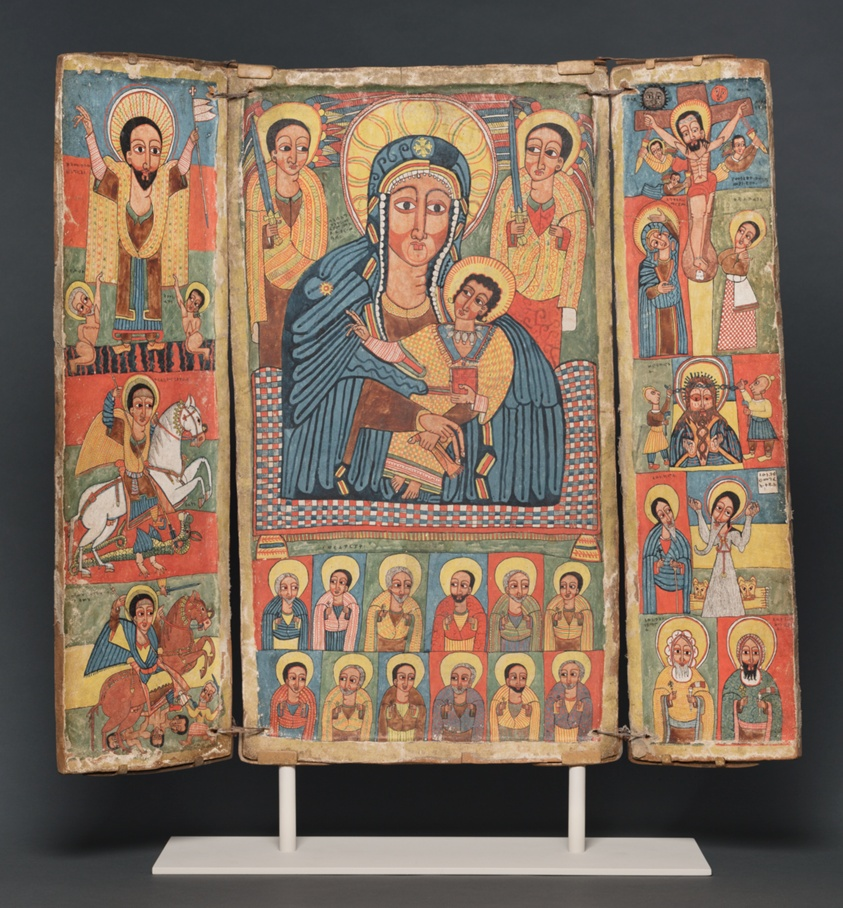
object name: Icon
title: Triptych Icon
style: gondar, Arts of Africa, ethiopia, african Art, Eastern and Southern Africa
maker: Central Ethiopia; Eastern and Southern Africa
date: Late 17th century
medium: Tempera on linen, mounted on wood and bound with cord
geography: Ethiopia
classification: triptych; arts of Africa; african art; ritual objects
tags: religion, biblical, Virgin and child/Madonna and child, Jesus, saints, procession, ritual, worship, Christian subjects